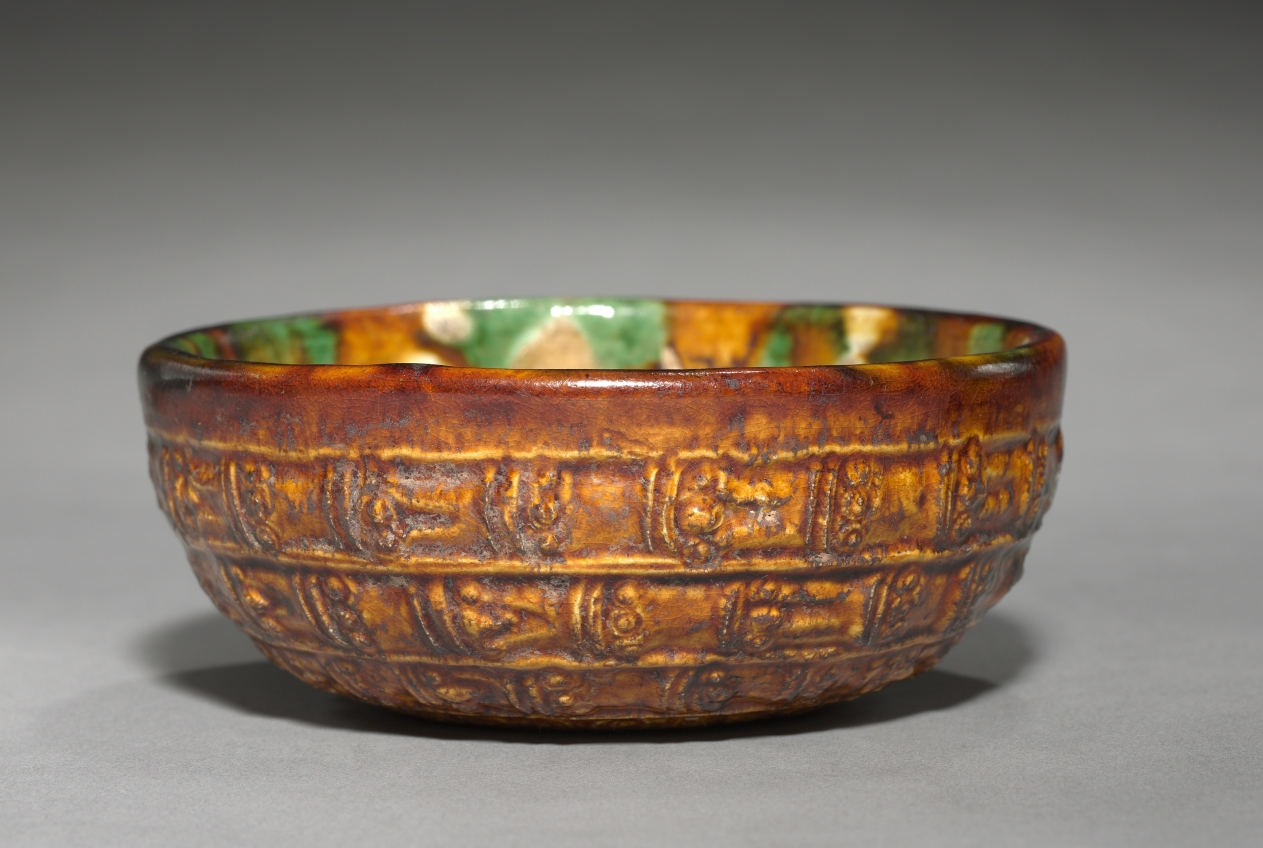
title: Bowl with Bands and Spirals in Relief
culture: China, Tang dynasty (618-907)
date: late 600s–early 800s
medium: glazed earthenware with molded decoration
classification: Ceramic